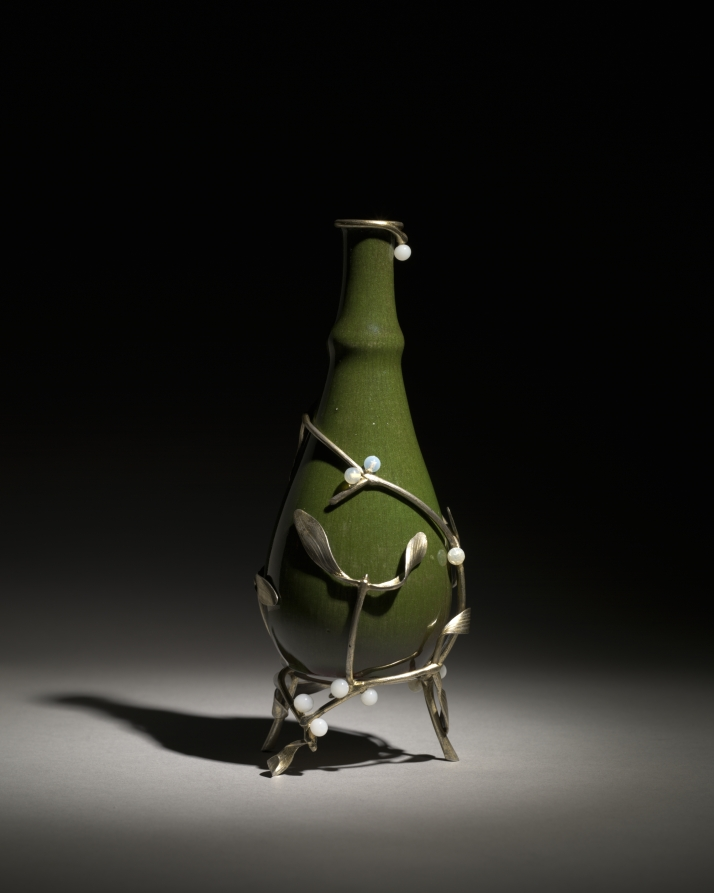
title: Vase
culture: France, late 19th Century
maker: Auguste Delaherche (French, 1857–1940)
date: c. 1893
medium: stoneware with silver mounts and glass beads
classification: Ceramic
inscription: Impressed on bottom of vase: August Delaherche, 1894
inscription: On mount: P. Hamelin 1893